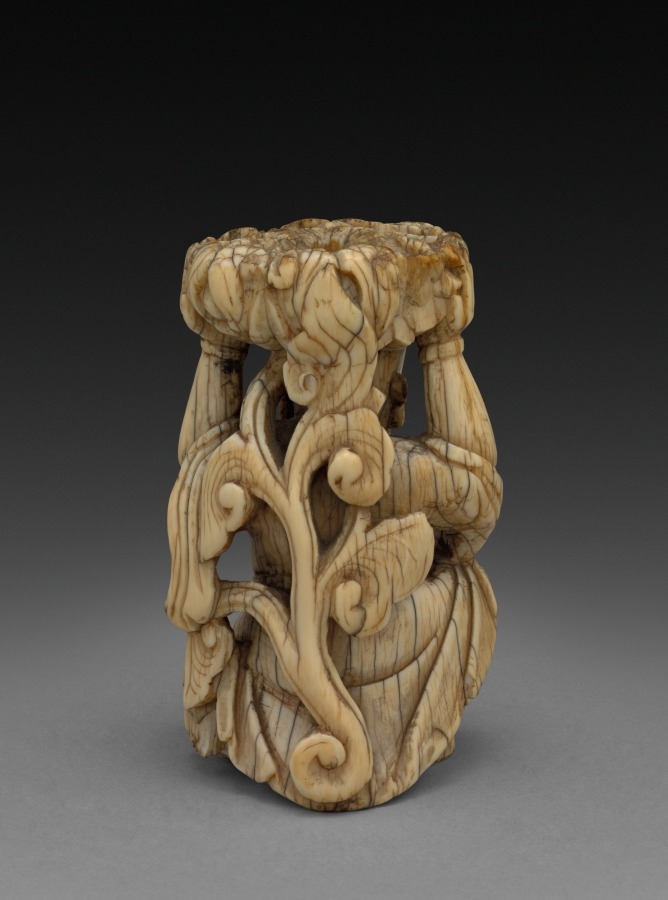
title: Kneeling Boy, Fragment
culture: China, Ming dynasty (1368–1644)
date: 1500s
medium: ivory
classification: Ivory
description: In the Ming dynasty (1368–1644), luxury items became more affordable to larger parts of the society, including women, merchants, and literati in non-official positions. Imperial patronage and a growing urban population encouraged consumption of luxury goods and local craftmanship. This ivory illustrates the superb carving skills and the creative mind of the skilled artisan who sought clients on a competitive market.